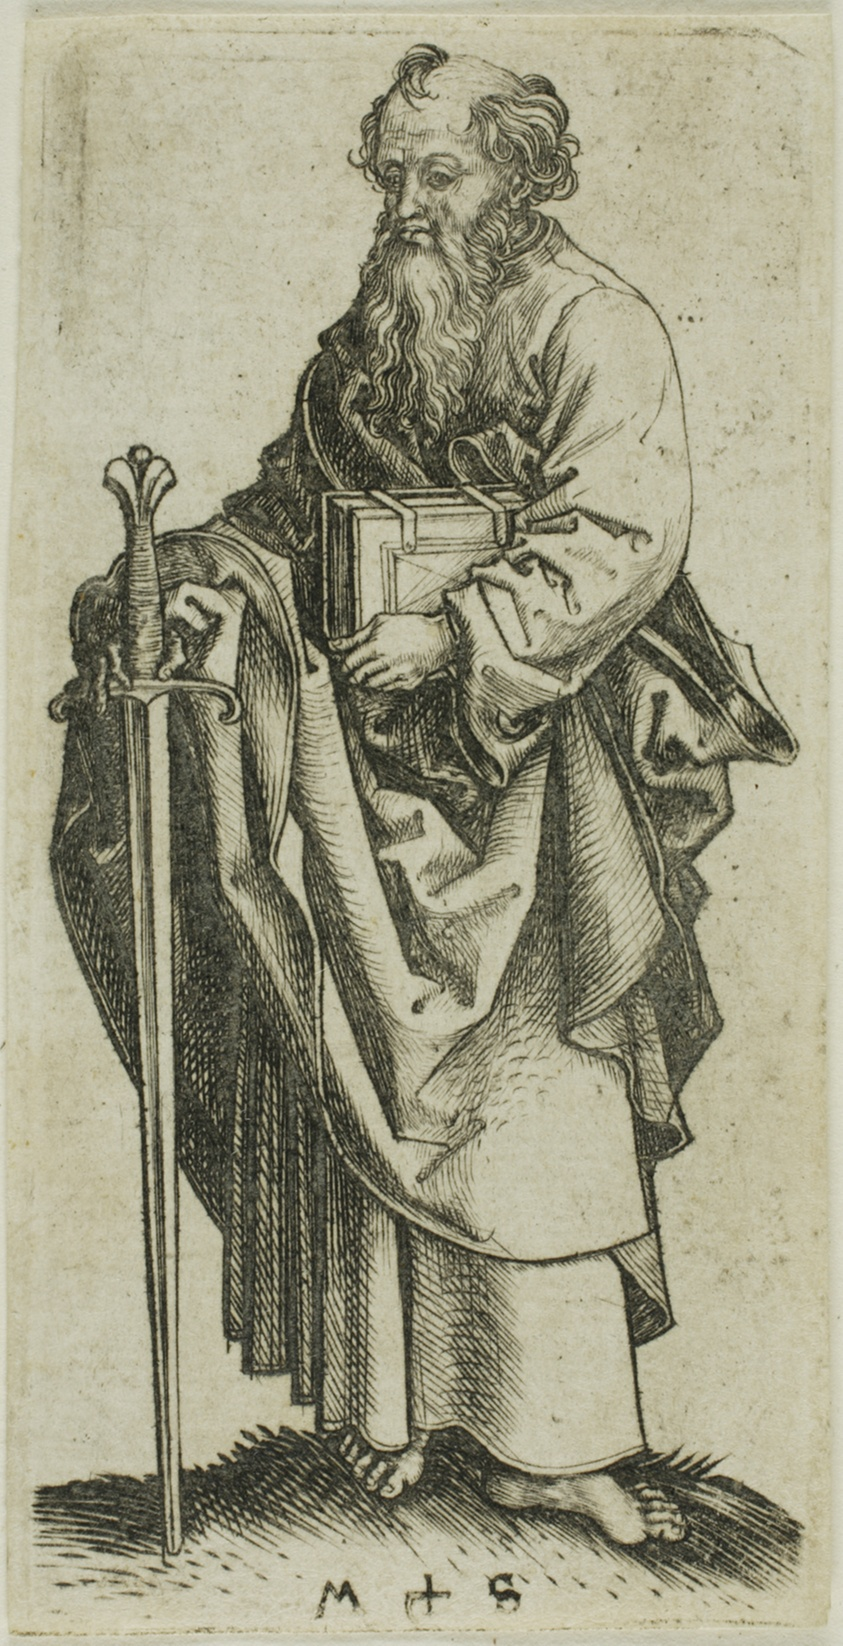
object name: Print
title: St. Paul, from Apostles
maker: Martin Schongauer (German, c. 1430/50-1491)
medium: Engraving on paper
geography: Germany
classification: engraving; print; prints and drawing